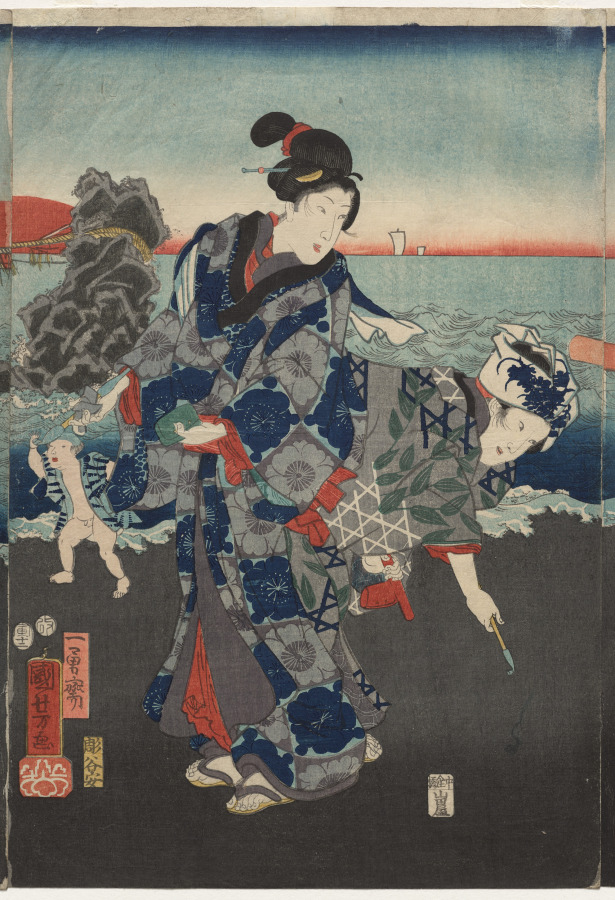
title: Splendid View at Futamigaura Bay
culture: Japan, Edo period (1615–1868)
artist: Utagawa Kuniyoshi (Japanese, 1797–1861)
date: 1854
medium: Center print from a triptych of color woodblock prints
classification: Print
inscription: Signature: Ichiyusai Kuniyoshi ga. Artist Seal: Paulownia. Publisher: Yamadaya Shohei (Nakabashi, emblem). Engraver: Hori Taniyasu. Censorship Seal: aratame.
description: This is one of three prints forming a continuous scene of figures visiting Futamigaura Bay near Ise Grand Shrine, one of Japan’s most sacred places. In the background, the sun rises between the “Wedded Rocks” joined by a twisted rope, called a shimenawa, used to designate a sanctified space. The rocks mark the entrance to Futami Okitama Shrine and are said to be embodiments of Izanagi and Izanami, the gods who, according to myth, created Japan. Futamigaura was a place where pilgrims purified themselves before visiting Ise and often lodged afterward.